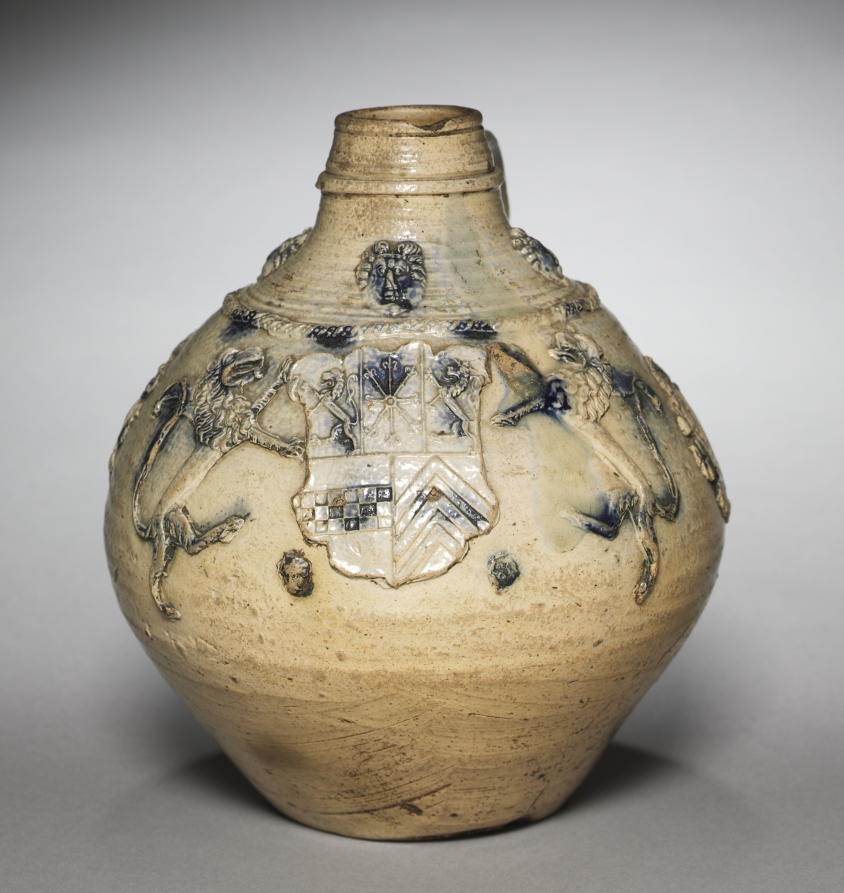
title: Jug with the Arms of Cleves-Berg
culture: Germany, Siegburg, 16th century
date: 1580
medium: salt-glazed stoneware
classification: Ceramic